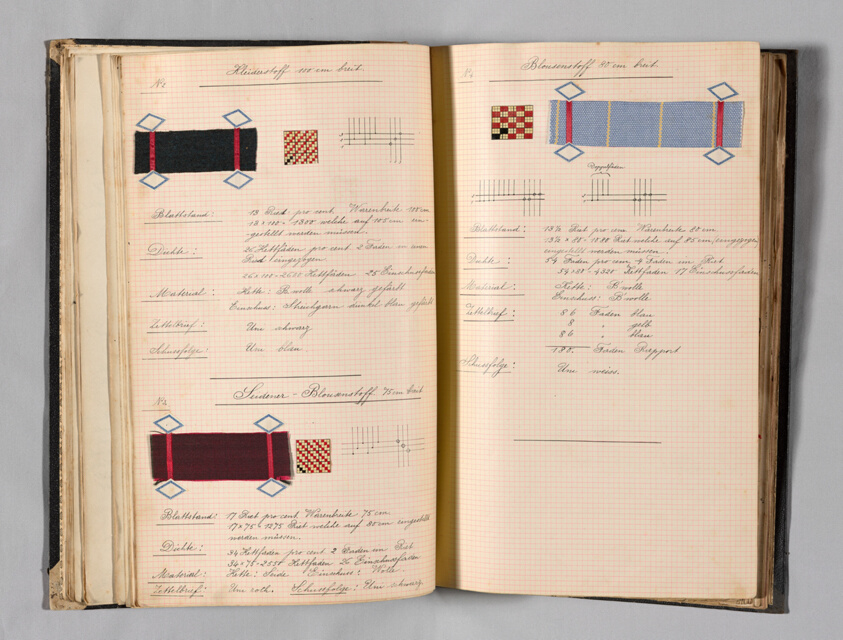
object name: Book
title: Student Notebook Containing Notes, Diagrams and Swatches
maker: Alfred Fehr (Switzerland, 1879-1955)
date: c. 1898–1900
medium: Bound notebook of technical notes and weave samples: fabrics for clothing and mixed goods, ribbed and twill cottons, and jacquard; 176 pages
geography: Germany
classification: book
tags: weaving, diagrams